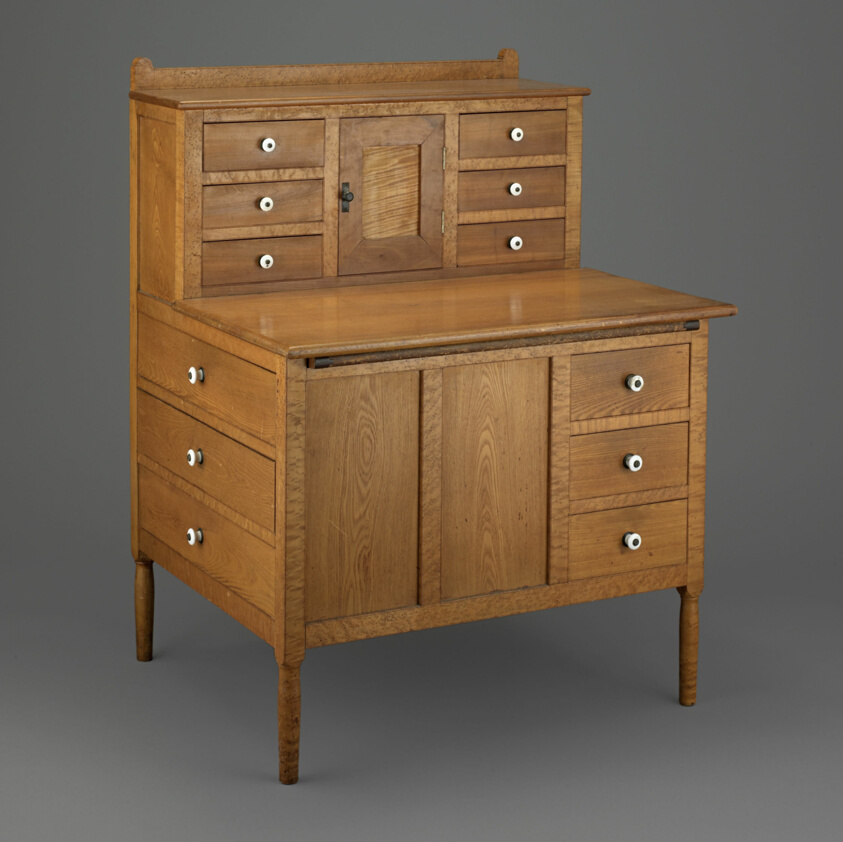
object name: Furniture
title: Sewing Desk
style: Folk Art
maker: Artist unknown (American, 19th century); Canterbury or Enfield, New Hampshire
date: 1860–70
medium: Cherry, birch, ash and maple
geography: New Hampshire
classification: furniture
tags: furniture